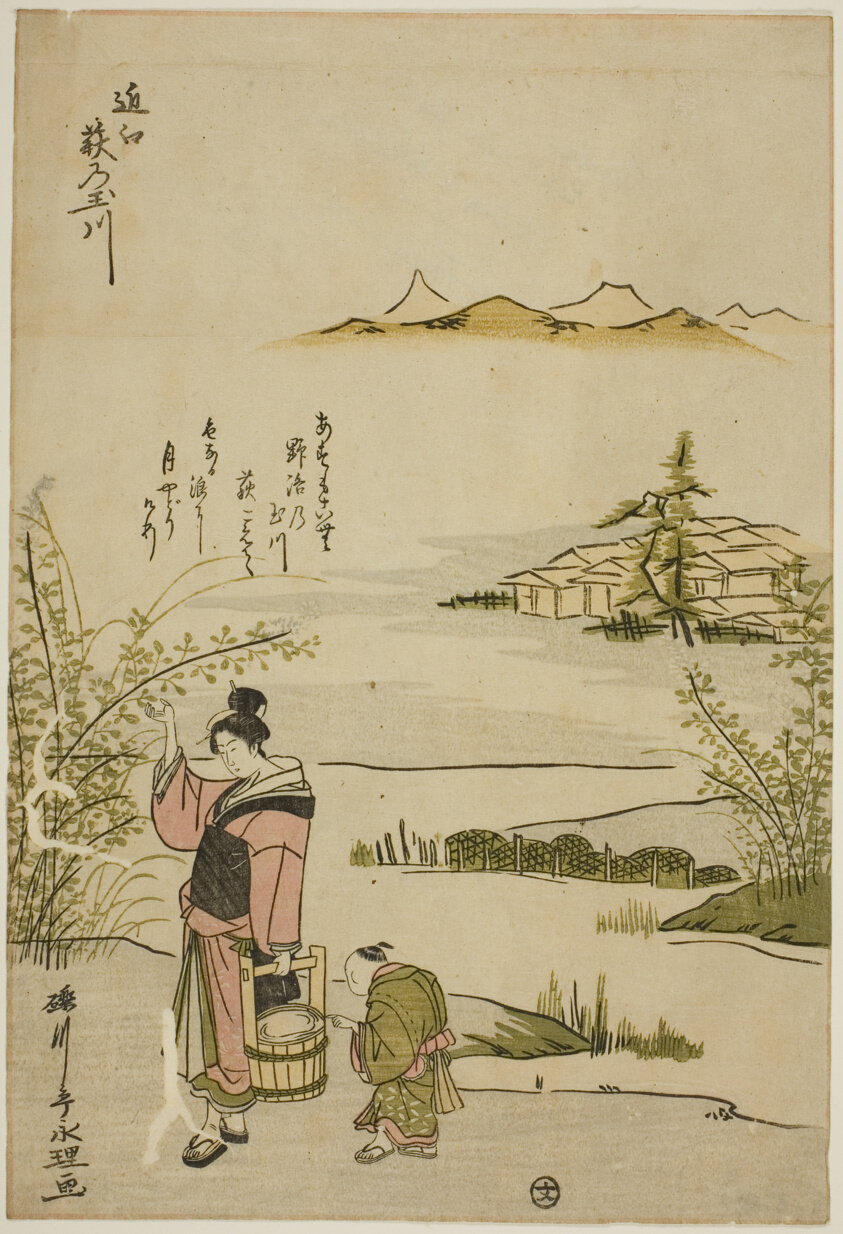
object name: Print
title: The Jewel River of Bush Clovers in Omi Province (Omi Hagi no Tamagawa), from an untitled series of Six Jewel Rivers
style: Japanese (culture or style)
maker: Rekisentei Eiri (Japanese, active c. 1781–1818)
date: c. 1785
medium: Color woodblock print; aiban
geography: Japan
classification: woodblock print; print; asian art